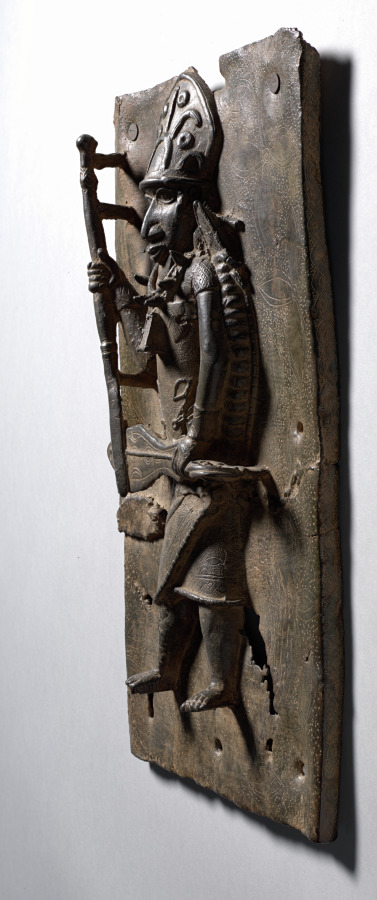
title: Plaque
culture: Nigeria, Benin Kingdom, Ẹdo peoples, members of the Igun Eronmwon (royal brasscasters) guild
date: 1500s–1600s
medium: Copper alloy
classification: Sculpture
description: Craftsmen modeled brass plaques like this in wax before casting them with hot metal. Molds pushed out figures’ general shapes, then details—such as this warrior’s staff and court sword (ẹbẹn)—were added by hand. Reflecting Benin’s global connections, the incised flowers may have Islamic or European origins. Called ebe-amẹn (river leaves) they are identified with Olókun, god of the waters. The interlaced side motifs may connect several early plaques also linked by topic and style. The palace plaques were in storage before the 1897 Siege of Benin. Recently, an art historian virtually reconstructed their former display in the palace based on their dimensions and imagery.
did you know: The bent sides of this plaque once helped attach it to wooden beams in a palace.